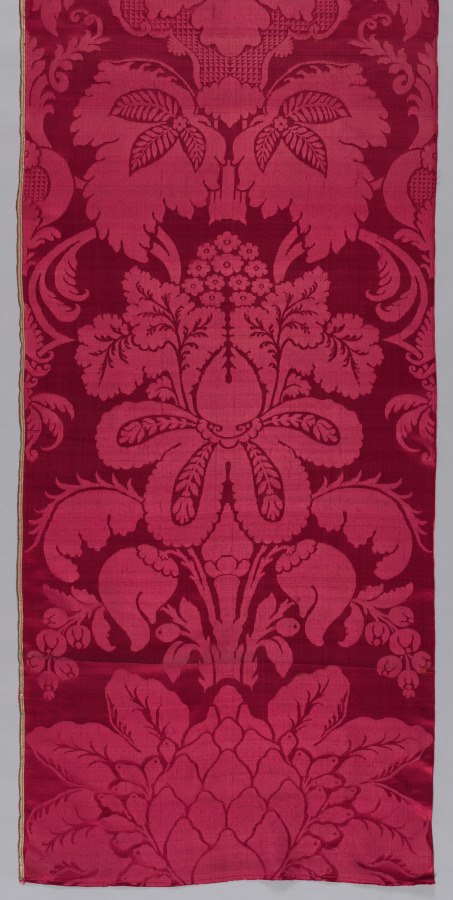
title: Two Large Damask Cloths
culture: Italy, 17th century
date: 1600s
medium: damask, silk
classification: Textile